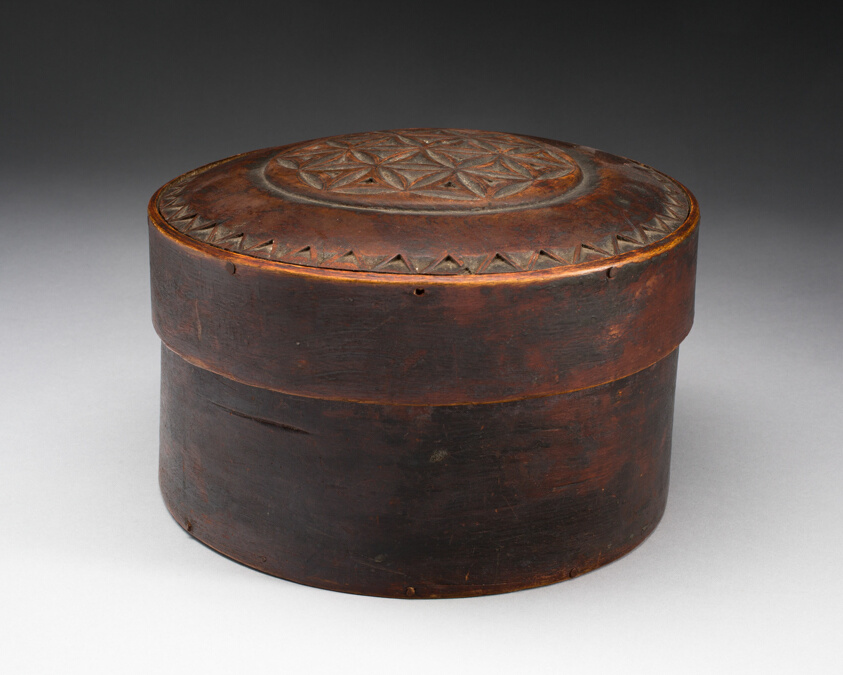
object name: Decorative Arts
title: Box with Lid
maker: Artist unknown (American, 18th–19th century)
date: 1790–1860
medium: Maple and pine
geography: United States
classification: case furniture; box; furniture; american decorative arts; american arts; decorative arts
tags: furniture